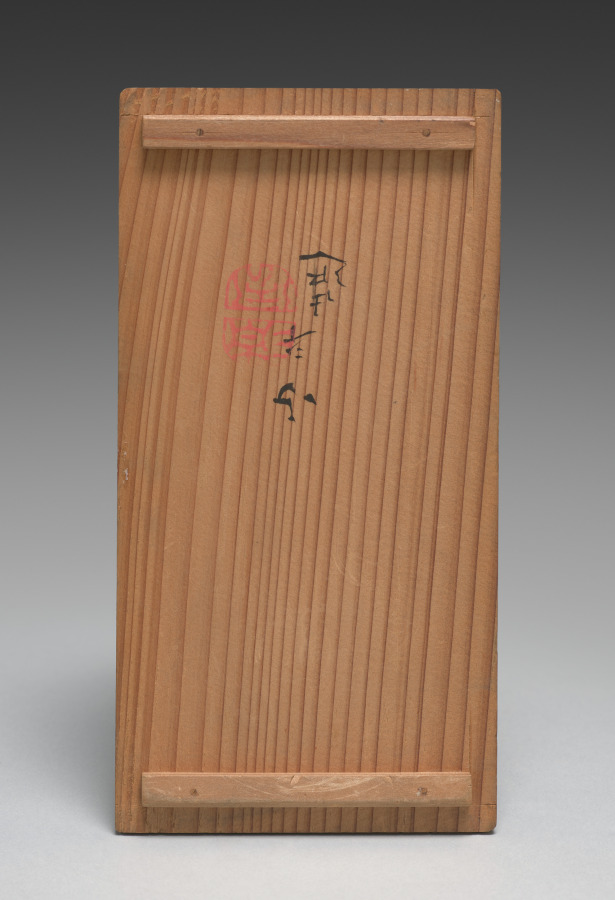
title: Sake Cups with Auspicious Flora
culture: Japan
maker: Seifū Yohei II (Japanese, 1844–1878)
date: 1861–78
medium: Pair of sake cups; porcelain with underglaze blue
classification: Ceramic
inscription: 松梅芝仙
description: Seifū Yohei II and his successor, Seifū Yohei III, trained in ink painting. Their brush skills are seen in their underglaze cobalt blue designs. One of Yohei II’s sake cups has depictions of orchid, bamboo, and chrysanthemum, representing spring, summer, and fall, while the other has pine and plum, representing winter. Just under the rim, he has also brushed the phrase “Pine, plum, and fungus immortals” (松梅芝仙).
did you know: These modest cups are important for the connoisseurship of the art of Yohei II because their original box is intact with a signature and seal on the interior of the lid.